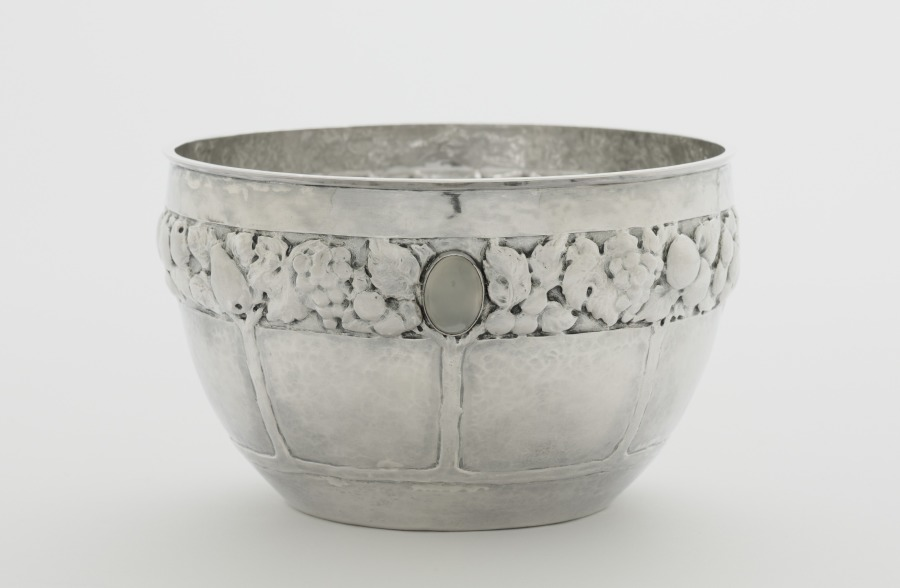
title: Waste Bowl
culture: America, Ohio, Cleveland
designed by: Louis Rorimer (American, 1872–1939)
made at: and Rokesley Shop (American)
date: c. 1910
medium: silver, moonstones, ebony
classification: Silver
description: This tea and coffee service was designed for production by the Rokesley Shop, a collaborative group working at Louis Rorimer’s studio. Reacting against industrial mass production, Rorimer emphasized inventive design in finely crafted objects.